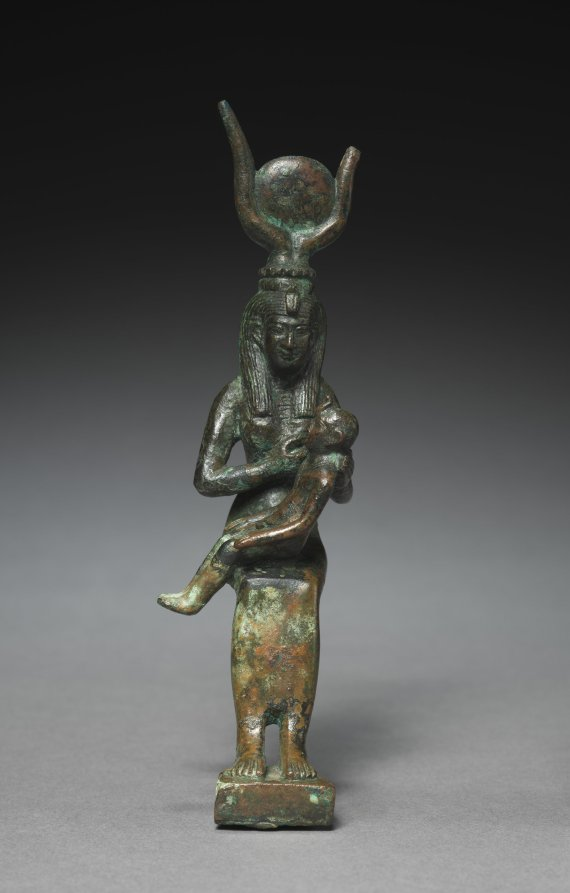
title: Statutette of Isis and Horus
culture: Egypt, Greco-Roman period (332 BCE–395 CE), Ptolemaic dynasty (305–30 BCE)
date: 305–30 BCE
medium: bronze, solid cast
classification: Sculpture